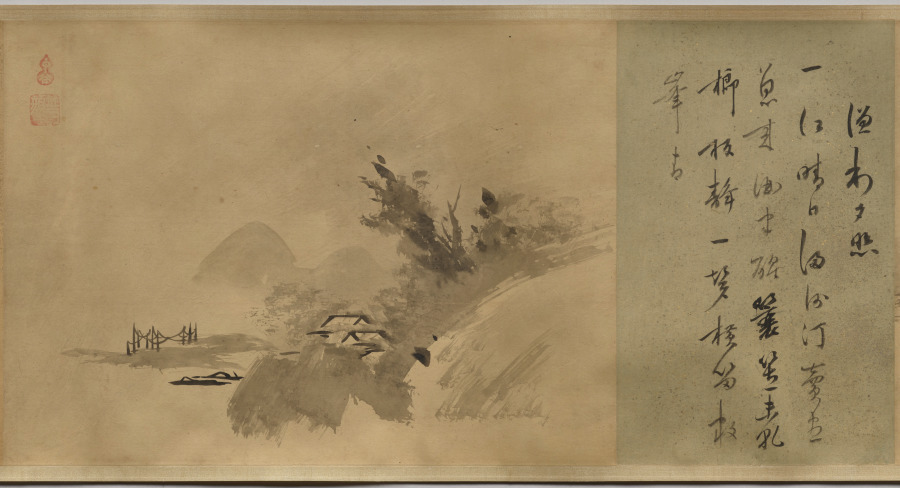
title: Poems and Pictures of the Eight Views of Xiao-Xiang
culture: Japan, Momoyama period (1573–1615)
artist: Unkoku Tōgan (Japanese, 1547–1618)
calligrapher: Inkei Gentetsu (Japanese, 1562–1612)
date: 1605–12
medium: Handscroll; ink on paper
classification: Painting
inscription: Each painting sealed with red gourd-shaped seal reading Unkoku (雲谷) and a square seal reading Tōgan (等顔).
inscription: Each painting prefaced with a titled poem on the Eight Views of Xiao-Xiang by Yujian Ruofen (active late 13th century) inscribed by Japanese Buddhist monk Inkei Gentetsu (1562–1612).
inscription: 右寫玉㵎之筆勢／雪舟末葉等顔筆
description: Unkoku Tōgan brushed these scenes using the splashed-ink technique associated in Japan with the Chinese monk Yujian Ruofen (active late 1200s). Xiao-Xiang refers to the region in present-day Hunan province, where the Xiang River and its tributaries converge. Each of the eight views evokes a time of day or season. The earliest surviving series of Xiao-Xiang paintings is by Wang Hong (active mid-1100s), but textual evidence tells us the theme appears earlier. It was later adopted in Japan and Korea, as seen here. The poems were inscribed by Inkei Gentetsu, the third abbot of the Rinzai Zen temple Tōshunji, Japan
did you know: The “Tō” of Tōgan comes from the name of painter Sesshū Tōyō (1420–1506).